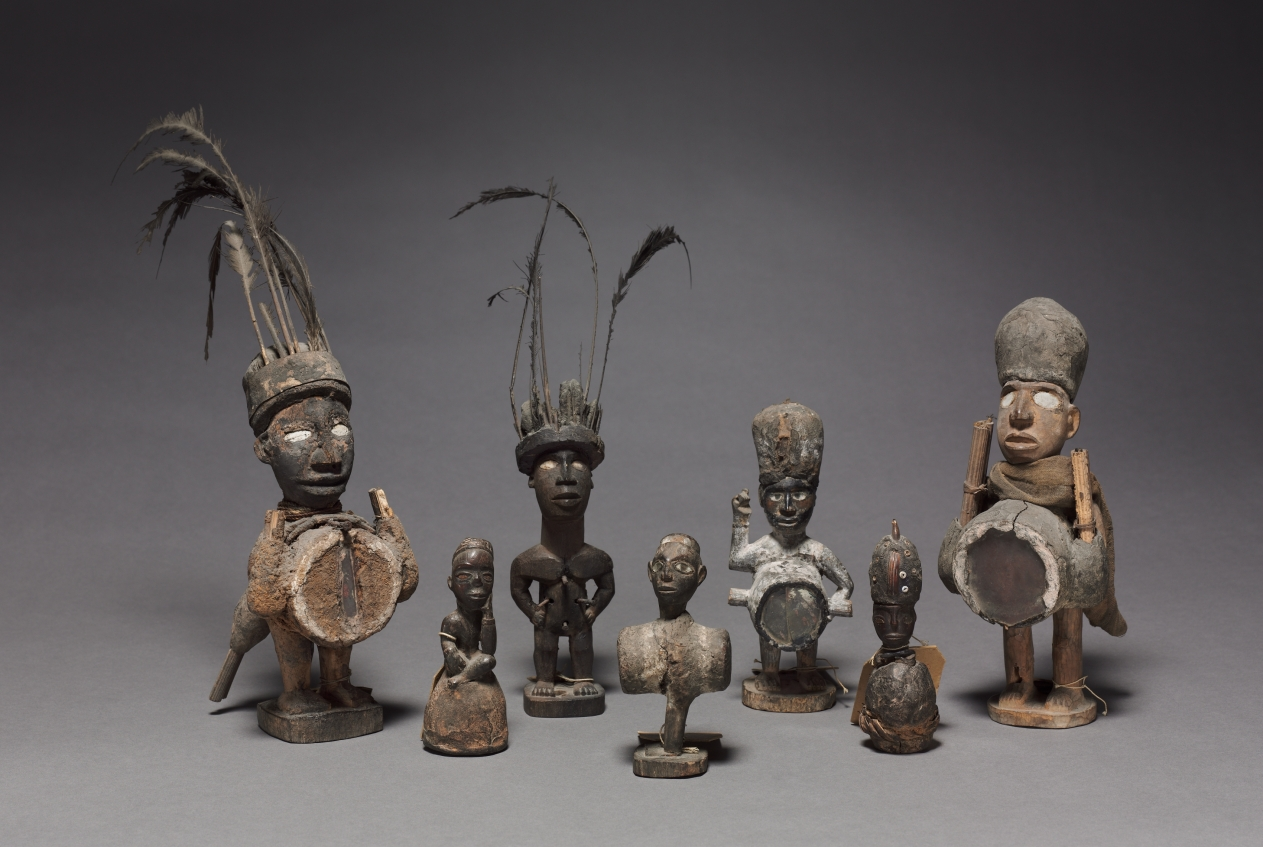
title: Power figure (nkisi)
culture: Central Africa, Republic of the Congo, Kongo people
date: late 1800s-early 1900s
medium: Wood, organic materials (including resin), probably kaolin, and metalized glass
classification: Sculpture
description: This figure is of the nduda type, characterized by the attached "guns" loaded with gunpowder and used to shoot witches. It is the only figure that adopts the threatening pose: the right hand raised, holding a spear or knife, and the left hand resting on the hip. Two guns protrude horizontally on both sides of the cylindrical medicine pack on the belly, covered with a round piece of mirror.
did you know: This is the only figure in a group of seven found in a French antique shop adopting a threatening pose.